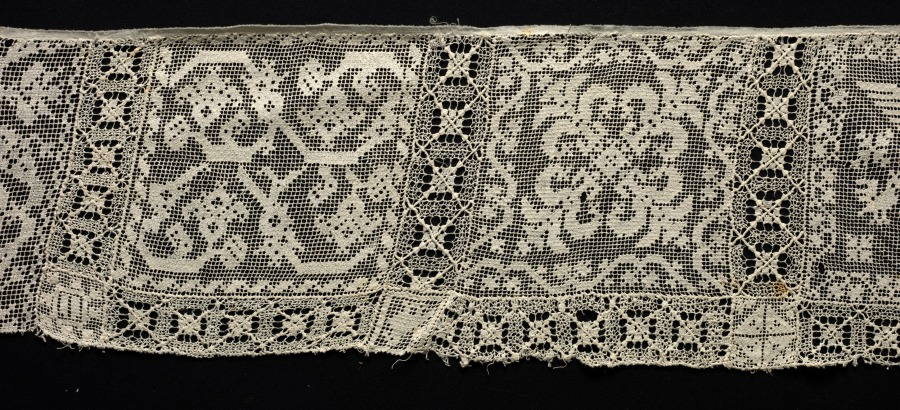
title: Band with Various Fantastic Creatures and Vegetal Patterns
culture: Italy, 1800s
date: 1800s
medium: Bleached linen (est.): needle lace, filet/lacis (knotted ground and darned in two directions)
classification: Lace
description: The reversed and backward orientation of many of the squares in this band of lace suggests that this was not their original layout. They were most likely taken apart and later joined back together in a disoriented manner.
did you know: The square showing a man in midair above a bull-like creature is reminiscent of the Minoan "Bull Leaping" fresco at the Knossos palace complex.